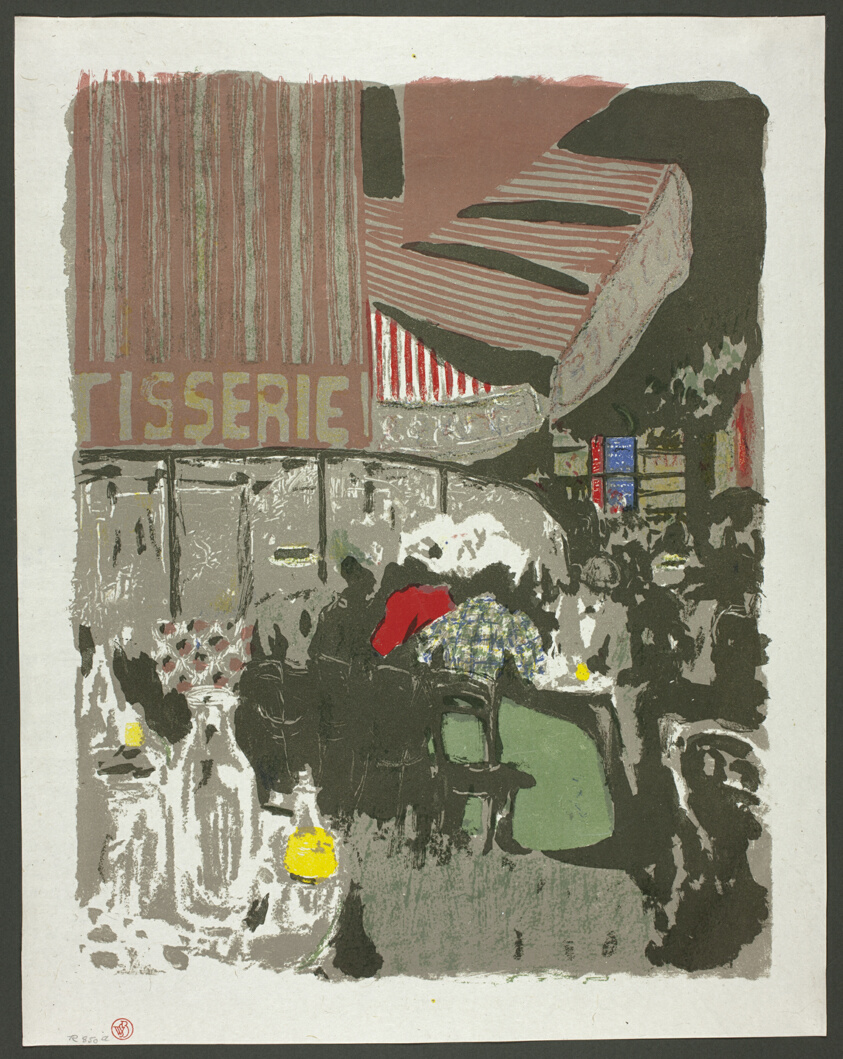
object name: Print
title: The Pastry Shop, plate ten from Landscapes and Interiors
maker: Edouard Vuillard (French, 1868-1940); printed by Auguste Clot (French, 1858-1936); published by Ambroise Vollard (French, 1867-1939)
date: 1899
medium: Color lithograph on grayish-ivory China paper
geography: France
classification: lithograph; print; prints and drawing